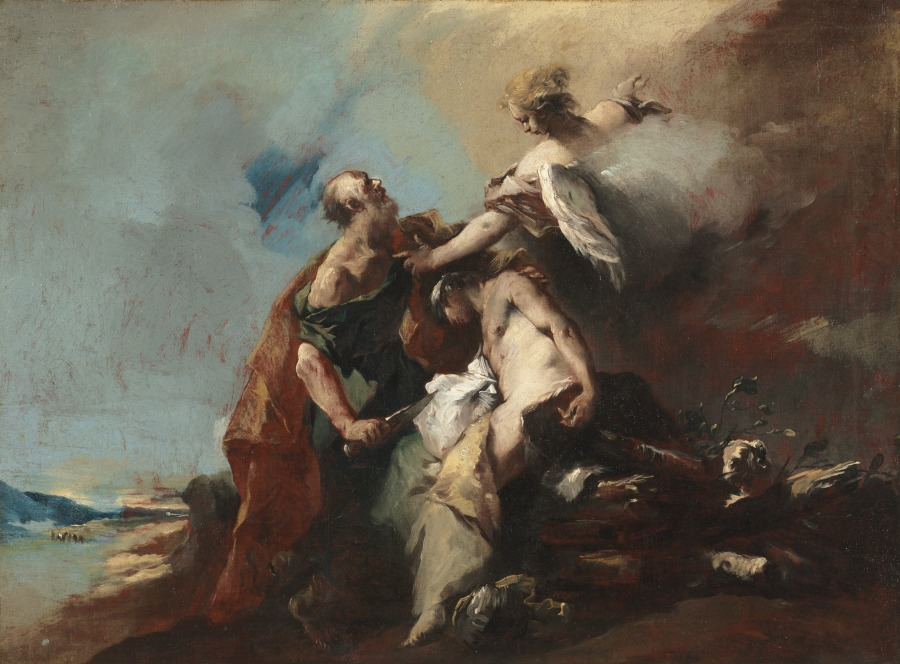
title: The Sacrifice of Isaac, Tobias and the Angel, The Angels Appearing to Abraham, Abraham Welcoming the Three Angels (painting series)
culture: Italy, 18th century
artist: Francesco Guardi (Italian, 1712–1793)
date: 1750s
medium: oil on canvas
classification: Painting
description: This series of paintings predominantly tells the Old Testament story of Abraham and Isaac, and each of the canvases treats the interaction of humans and angels. In three works, angels appear to Abraham and, in one particularly dramatic canvas, an angel intercepts Abraham before he sacrifices his own son. Like another work in this series, Tobias and the Angels, the Sacrifice of Isaac is a narrative about fathers and sons as well as obedience inspired by faith.